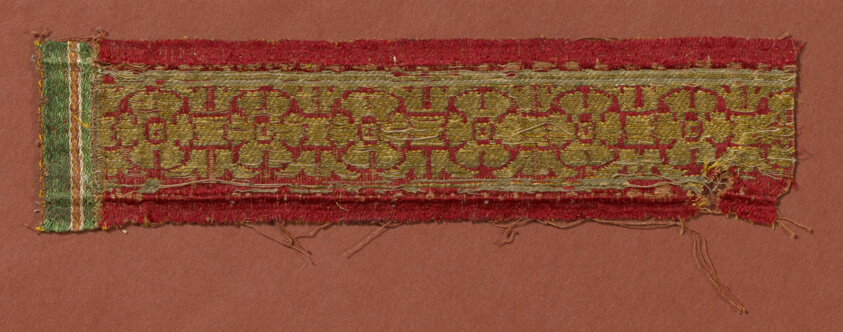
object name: Textile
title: Border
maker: Italy, probably Florence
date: 15th century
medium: Silk, gold gilt strip wound around linen fiber core, intergrated compound-weave of warp-float faced satin weave and twill weave with supplementary patterning wefts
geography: Italy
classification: textile; weaving